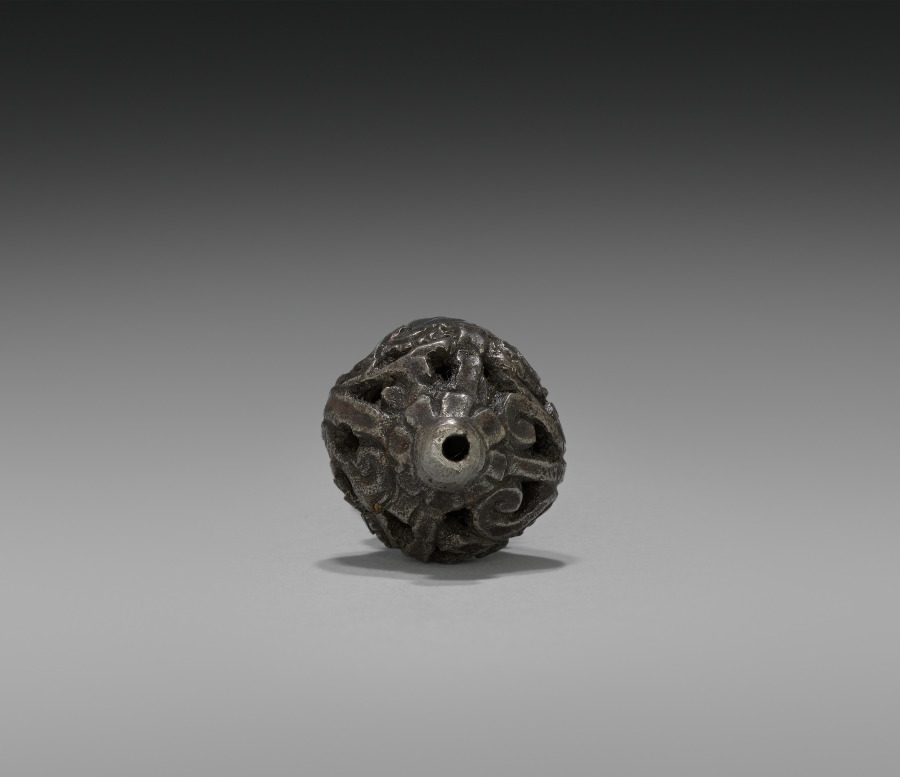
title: Pommel and Grip of Dress Sword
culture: Italy, 17th century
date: 1600s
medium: steel, chiseled, chased, and pierced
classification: Arms and Armor